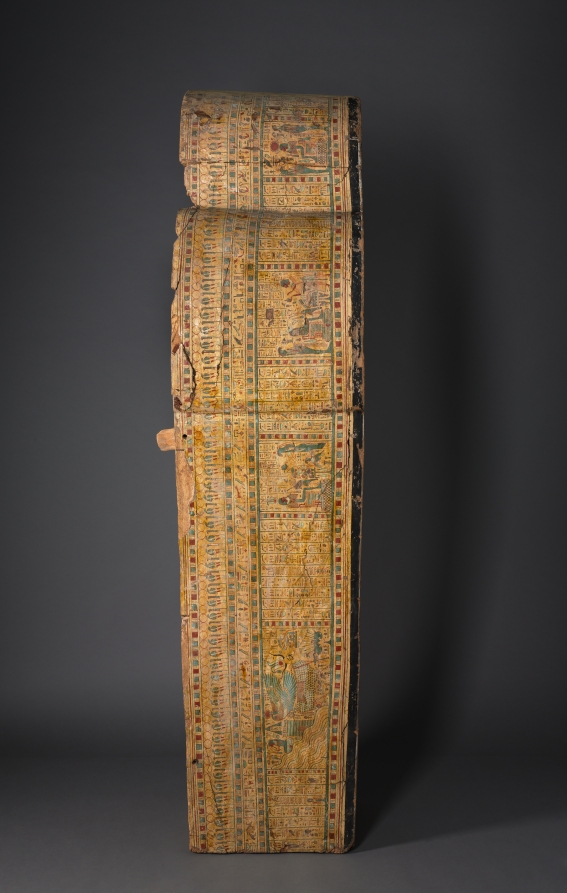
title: Coffin of Nesykhonsu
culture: Egypt, Thebes, Third Intermediate (1069–715 BCE), Dynasties 21–22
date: c. 976–889 BCE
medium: gessoed and painted sycamore fig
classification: Funerary Equipment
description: Egyptian coffins told stories and illustrated spells to help the deceased transition safely to the afterlife. Inside Nesykhonsu's coffin there are two jackals, one facing right and the other left, near the top. Here, the jackal represents the powerful deity Anubis, the god of the afterlife and embalming.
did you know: Two of Nesykhonsu's titles, "Lady of the House" and "Singer of the Choir of Mut the Great," are written on the outside of the coffin.